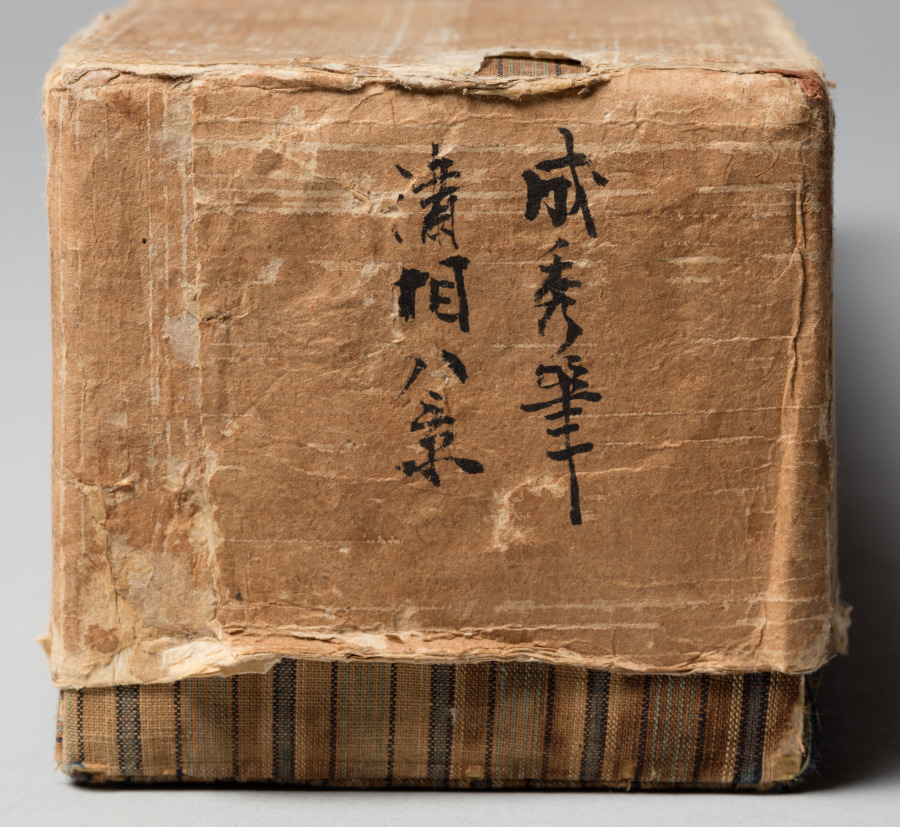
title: Landscape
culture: Japan, Muromachi period (1392–1573)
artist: Narihide (Japanese, active 1500s)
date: 1500s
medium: hanging scroll; ink on paper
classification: Painting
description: This composition includes imagery from the Eight Views of the Xiao and Xiang Rivers. Scanning the composition from top to bottom, at least six of the views are discernible: night rain over Xiao and Xiang, evening bell from a mist-shrouded temple, returning sails off a distant shore, geese descending to a sandbar, mountain village in clearing mist, and sunset glow over a fishing village. Inside the painting’s box is a document with a long inscription by prominent calligrapher, collector, and connoisseur Maeda Kōsetsu (1841–1916) discussing the painting’s subject and the matter of the painter’s biography—he appears to have been a Kano school artist, but his precise identity is unclear.